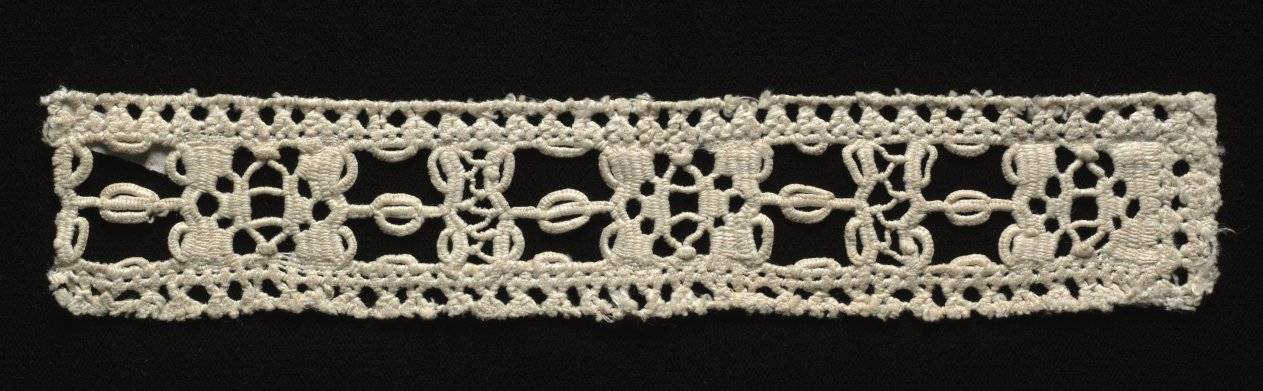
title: Lace fragment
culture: Italy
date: 1500s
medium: Linen: needle lace (drawnwork) insertion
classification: Lace